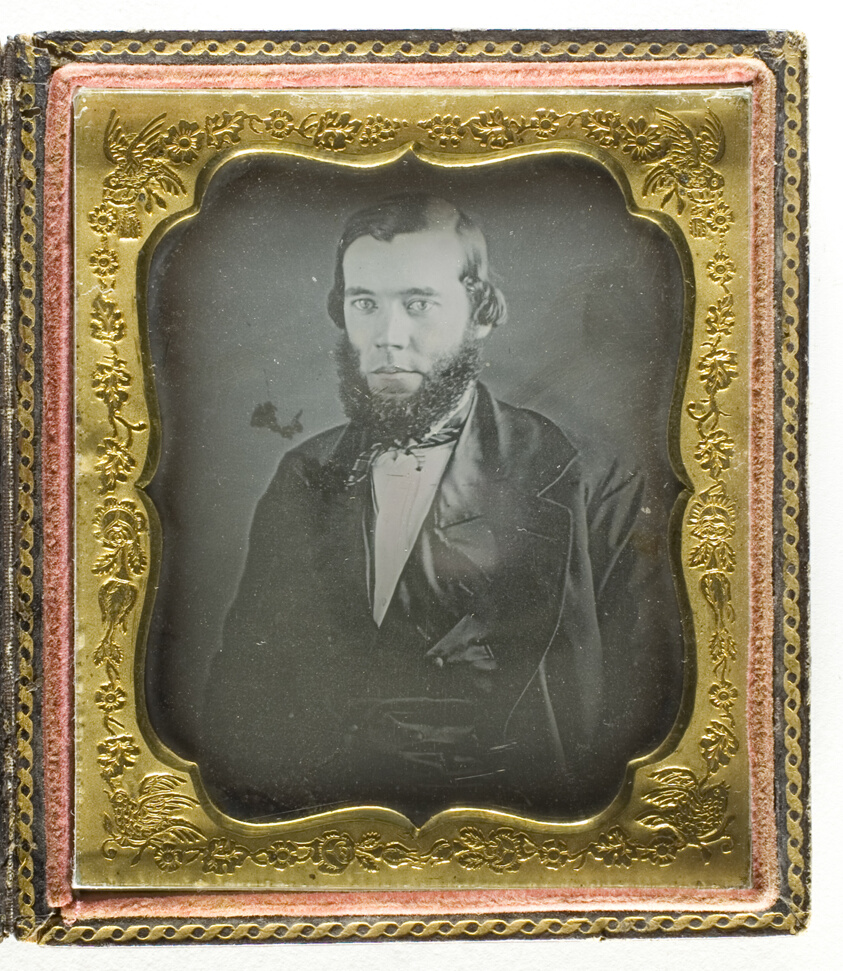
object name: Photograph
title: Untitled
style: 19th century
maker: Knapp (American, active 1850s)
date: c. 1850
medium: Daguerreotype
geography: United States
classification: daguerreotype; photographic process; photography; photograph